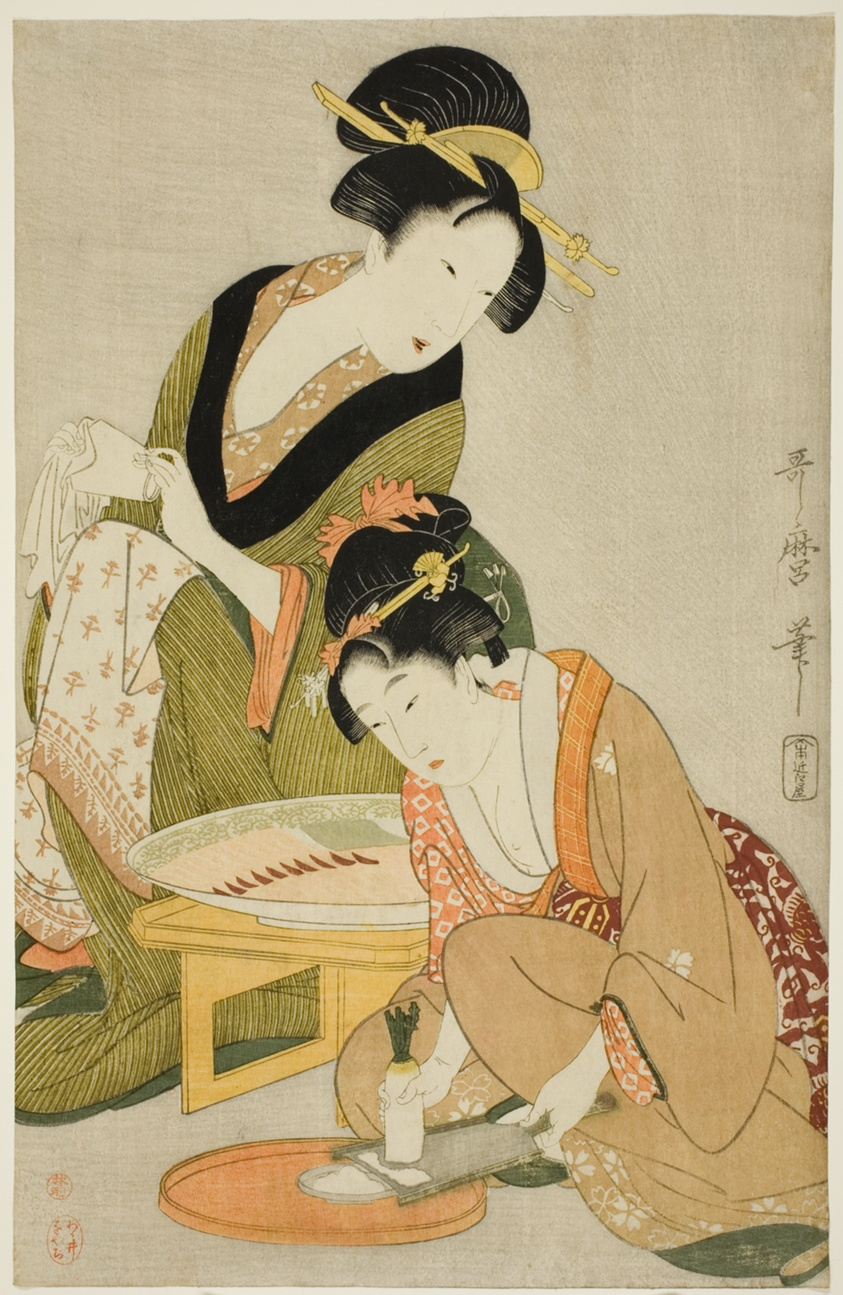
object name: Print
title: Preparing a Meal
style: Japanese (culture or style)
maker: Kitagawa Utamaro 喜多川 歌麿; Japanese, 1753 (?)-1806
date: c. 1798/99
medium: Color woodblock print; oban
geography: Japan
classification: woodblock print; print; asian art